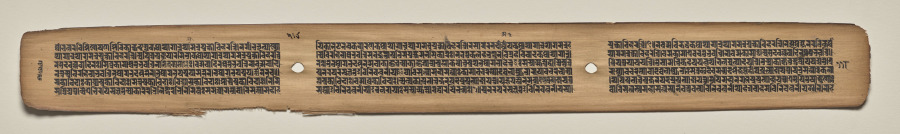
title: Text, Folio 118 (verso), from a Manuscript of the Perfection of Wisdom in Eight Thousand Lines (Ashtasahasrika Prajnaparamita-sutra)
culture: Eastern India, Bihar, Vikramashila Monastery. Painting: Nepal, Kathmandu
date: Sunday, September 14, 1119 (year 239 of the Newar Samvat in the month of Ashvina)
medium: gum tempera and ink on palm leaves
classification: Painting